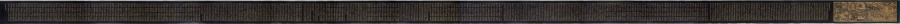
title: Lotus Sutra with a Frontispiece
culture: China, Song dynasty (960–1279)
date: late 1100s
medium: handscroll; gold ink on indigo sutra paper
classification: Painting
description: The frontispiece of this sutra, a sacred Buddhist scripture, illustrates episodes mentioned in the Buddha’s teaching. The sutra begins with a description of the historic Buddha Shakyamuni’s assembly on Vulture Peak. On the right, the Buddha sits amid members of his congregation: lohans (or arhats), bodhisattvas, gods, and other beings. The narrative proceeds from right to left. Heavenly light emanates from Shakyamuni’s brow to “illuminate the eighteen thousand worlds to the east.” Illustrated immediately below the ray is the sutra’s promise that if anyone carves or paints images of the Buddha “they will achieve the Buddha path.” The female figures in the frontispiece point to another promise made in this popular Mahayana school sutra, namely that female devotees and nuns who read the sutra are promised Buddhahood and salvation.